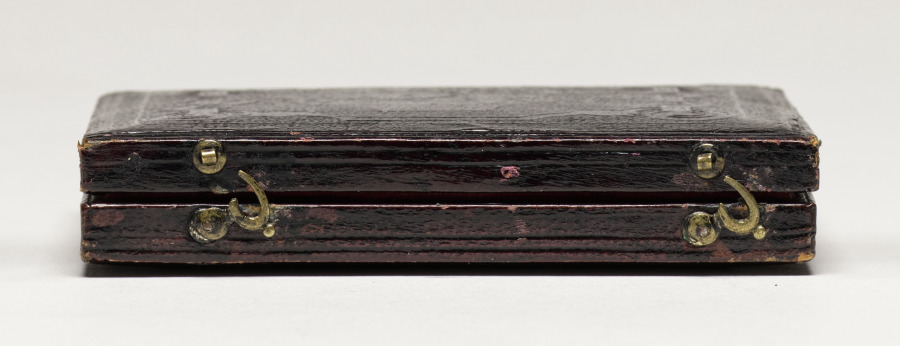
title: Mother and Child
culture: America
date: c. 1860–65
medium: daguerreotype, applied color, sixth-plate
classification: Photograph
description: Some of the most inventive and technically skilled practitioners in the early history of photography are as yet unidentified. However, with time more of these individuals will probably be recognized by name. Introduced into America soon after its invention in 1839 by the Frenchman Louis-Jacques-Mandé Daguerre, the daguerreotype flourished from 1840 to the mid-1860s. This beautiful daguerreotype in its original case is an outstanding example of a very popular subject: mother and child. The polished silver plate precisely renders in warm tones the likeness of the elaborately dressed sitters. The mother gently steadied the child's head so that it would not move during the long exposure required by the daguerreotype process. Clearly, the maker's knowledge of chemistry and traditional principles of design were necessary for this charming portrait.